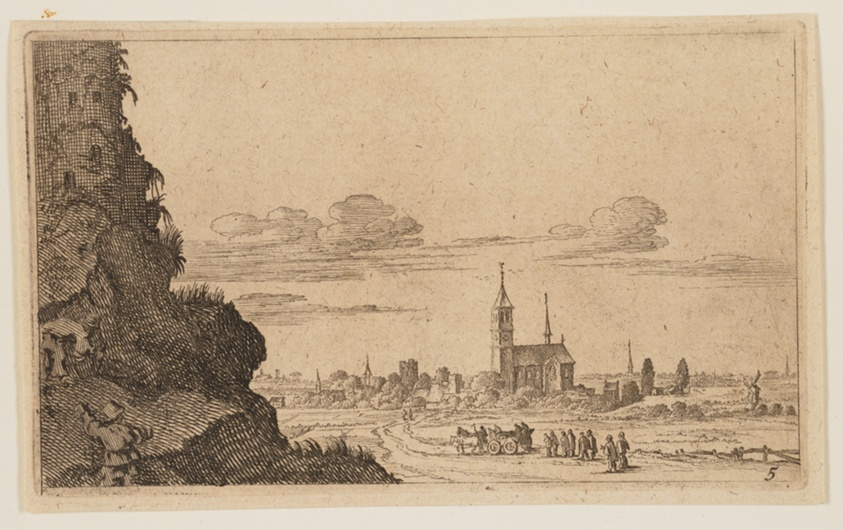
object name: Print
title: Two Men Climbing Rocks up to Ruins, from Twelve Landscapes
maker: Gillis van Scheyndel (Dutch, 1595–1660)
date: c. 1605-1650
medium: Etching on ivory laid paper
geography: Netherlands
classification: etching; paper; print; prints and drawing